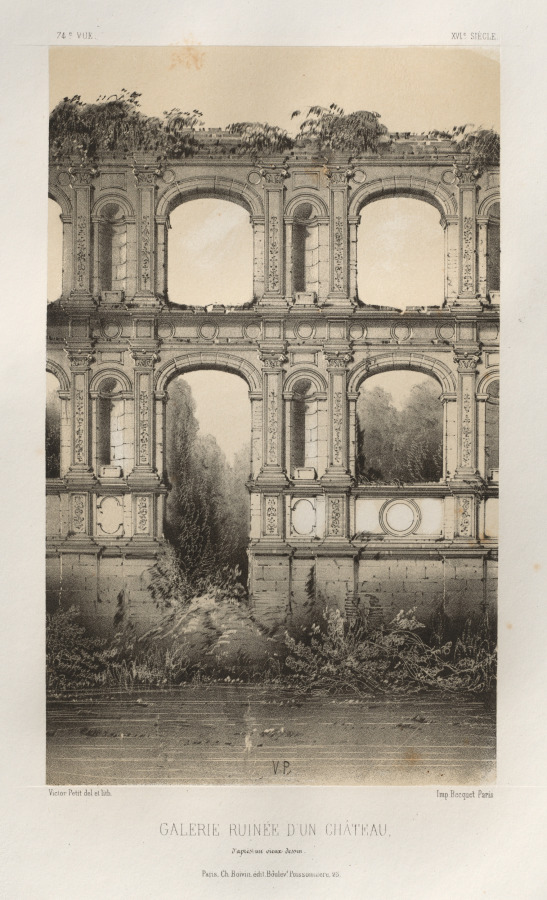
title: Architecture Pittoresque ou Monuments des XVeme. Et XVIeme. Siecles: Chateaux de France des XV et XVI Siecles: Pl. 74, Galerie Ruinée D'Un Château, d'aprés un vieux dessin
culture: France, 19th century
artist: Victor Petit (French, 1817–1874)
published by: Charles Boivin (publisher and editor); Lith de Godard a Paris (printer)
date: 1860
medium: lithograph with tint stone, from portfolio of 100 lithographs with tint stone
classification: Print